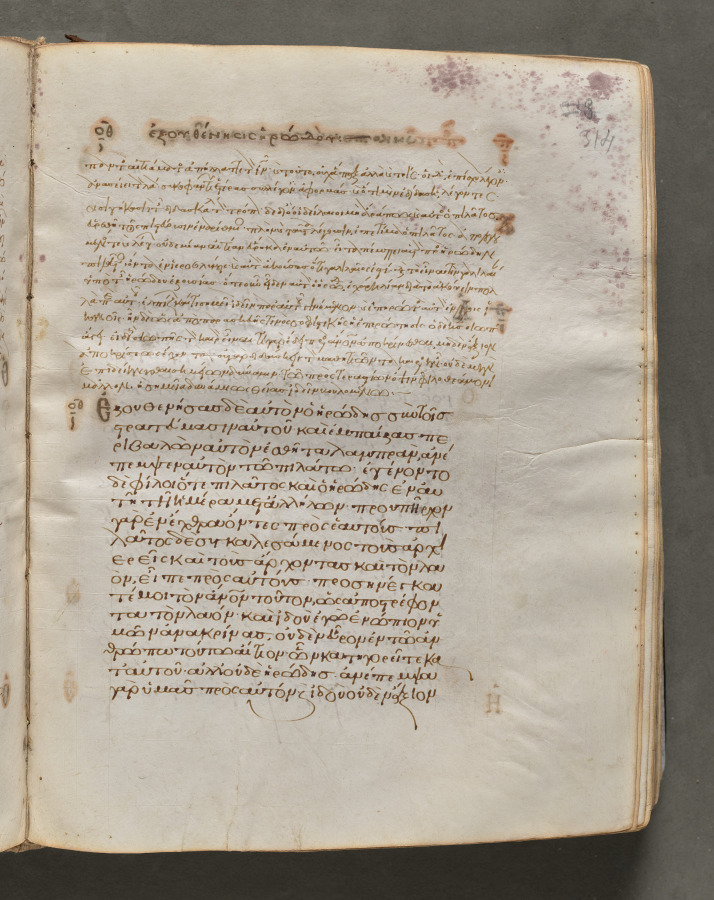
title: Text, folio 314 (recto), from a Gospel Book with Commentaries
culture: Byzantium, Constantinople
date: c. 1000–1100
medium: ink, tempera, and gold on vellum; leather binding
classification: Bound Volume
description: Each of the four gospels in this book opens on a page with brilliantly illuminated borders depicting the author of the text as well as birds—principally peacocks, symbols of the immortality of the soul—and fountains, representing the fountain of life and the salvation of the soul. This volume consists of 428 leaves with texts in Greek. Its level of sophistication suggests that it was probably written and decorated in a monastery in Constantinople.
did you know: Gospel books were carried in procession through Byzantine churches.